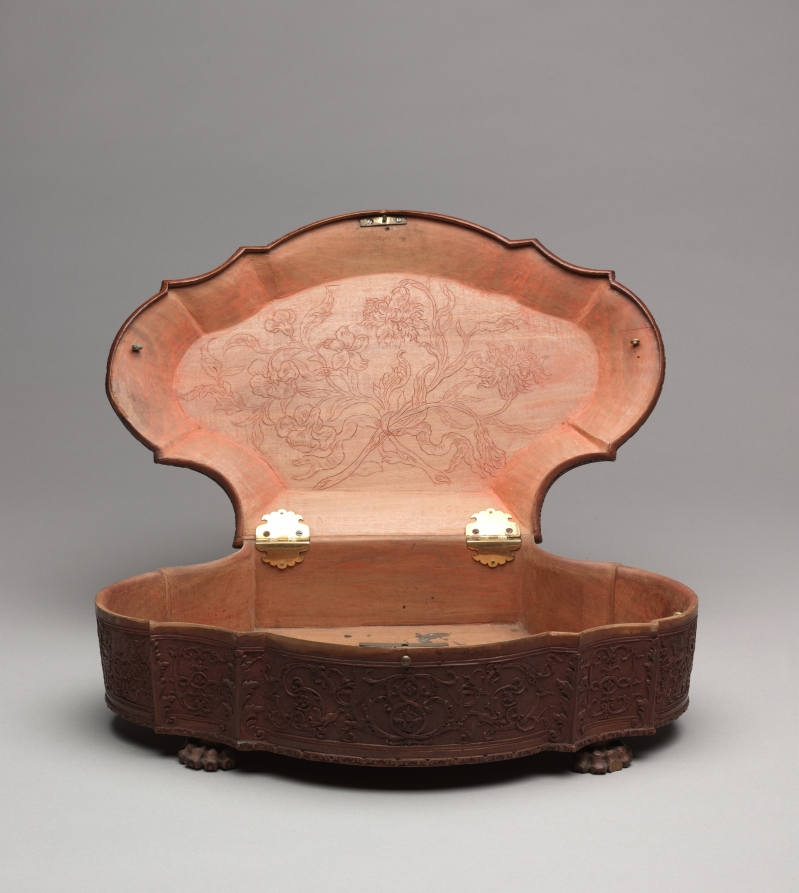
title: Box (1 of 2)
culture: France, Nancy, early 18th century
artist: Bagard (French)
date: early 1700s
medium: wood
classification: Furniture and woodwork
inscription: on top of box, initials crowned by coronet